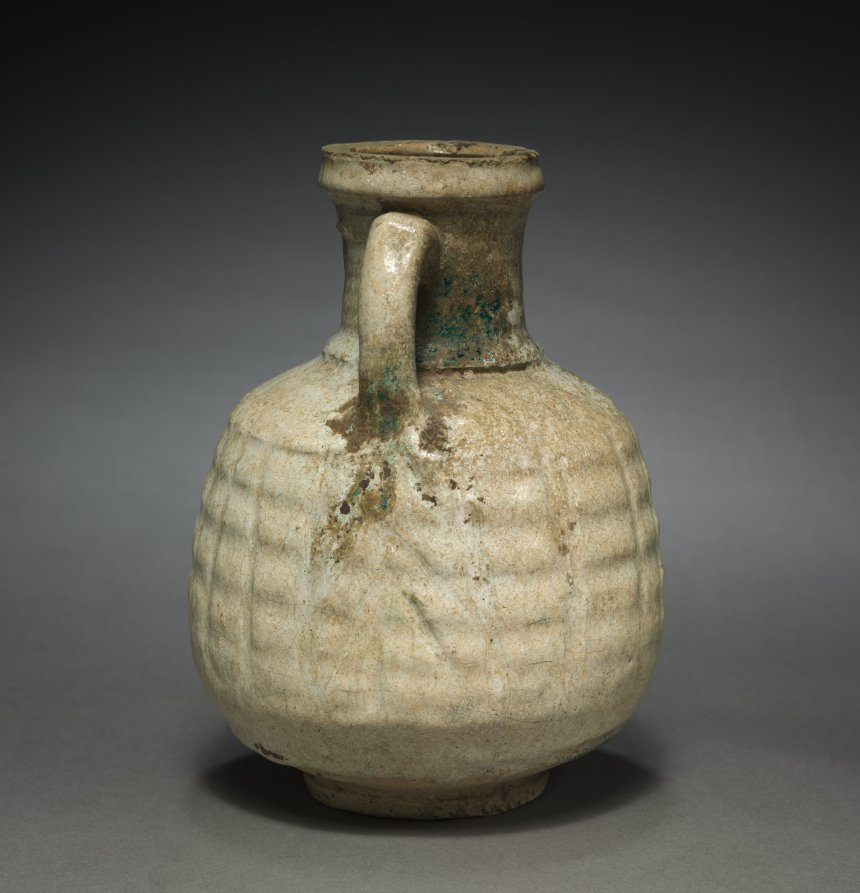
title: Vase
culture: Parthian Empire (247 BCE–224 CE)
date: 1–200 CE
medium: terracotta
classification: Ceramic